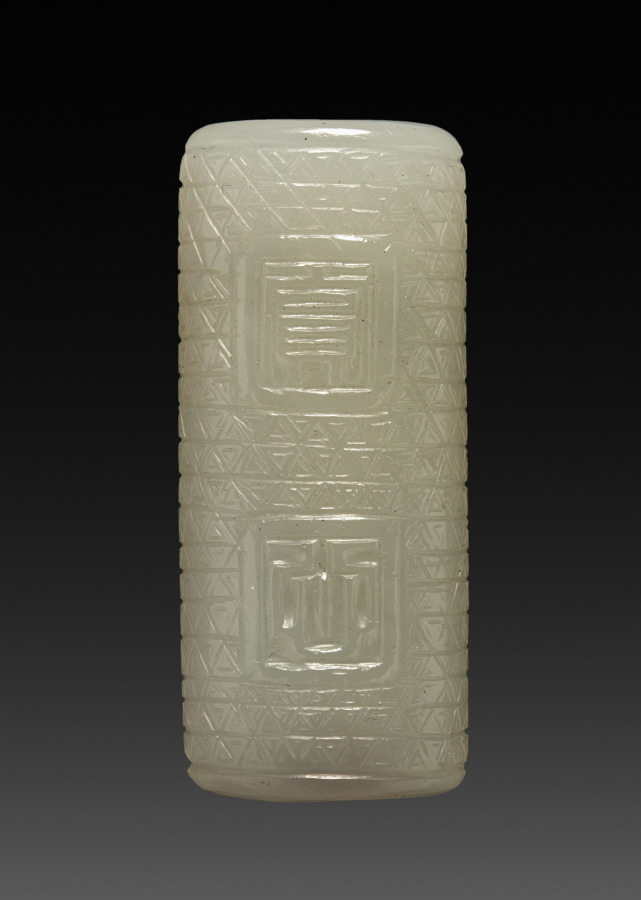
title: Ornament - Bead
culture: China, Qing dynasty (1644–1911), Qianlong reign (1736–95)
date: 1736–1795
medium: jade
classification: Jade